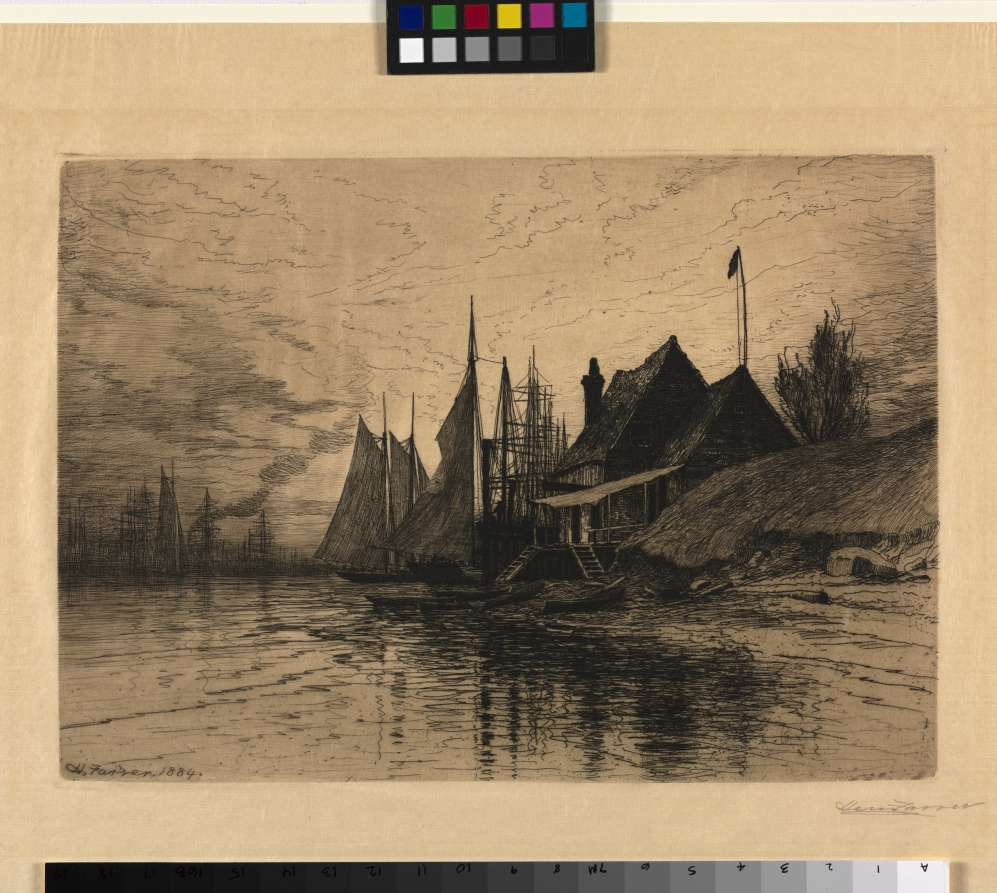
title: Evening, New York Harbor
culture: America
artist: Henry Farrer (American, 1843–1903)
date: 1884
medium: etching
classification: Print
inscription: lower right, in graphite: Henry Farrer